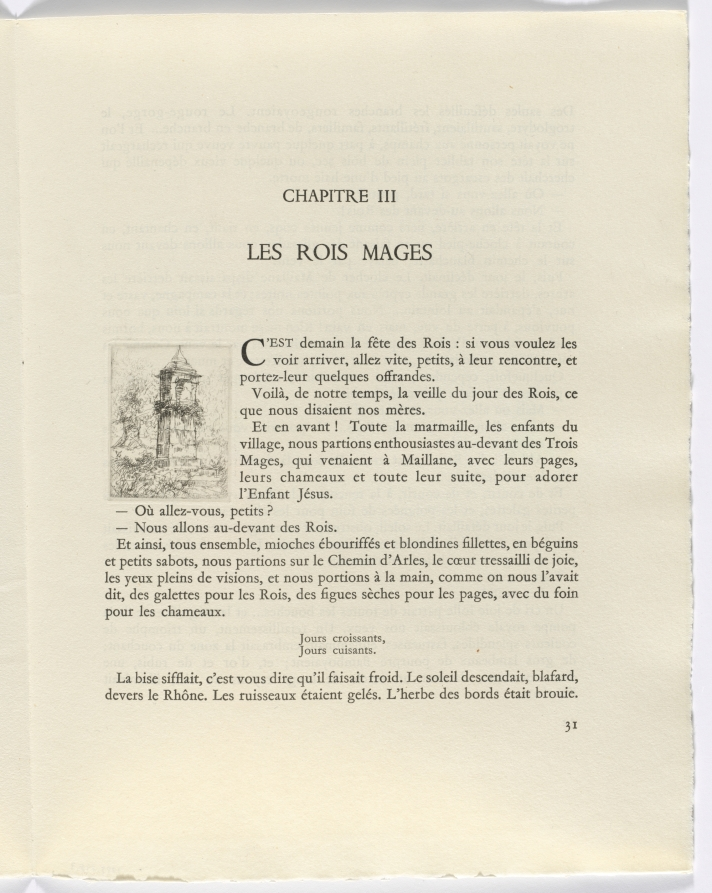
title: Frédéric Mistral: Mémoires et Recits by Frédéric Mistral: pillar (page 31)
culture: France, 20th century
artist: Auguste Brouet (French, 1872–1941)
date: 1937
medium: etchings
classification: Portfolio